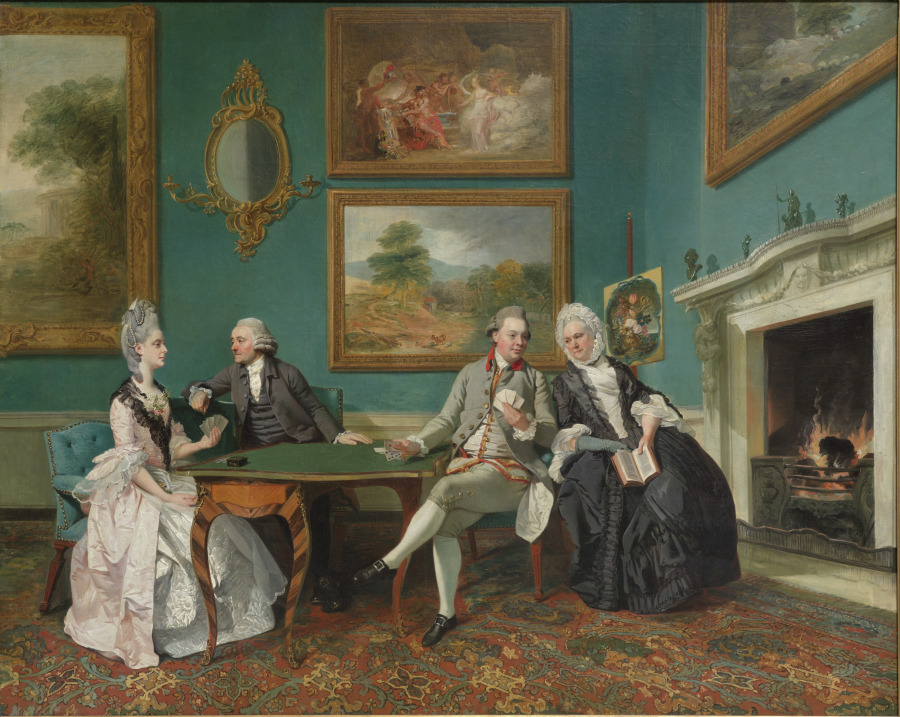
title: The Dutton Family in the Drawing Room of Sherborne Park, Gloucestershire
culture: England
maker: Johann Zoffany (German, 1733–1810)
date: c. 1772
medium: oil on canvas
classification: Painting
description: This type of picture, known as a conversation piece, was invented in England in the 1700s and popular for the informal way it represented families. A father and daughter, mother and son, are strategizing over the next hand in a game of cards. The family recently lost a loved one, so the parents are dressed in full mourning (black clothing), and the siblings in lesser mourning (mauve, white, and gray).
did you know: This is an idealized, not actual, room showing the sitters’ fashionable interior decorating aspirations.